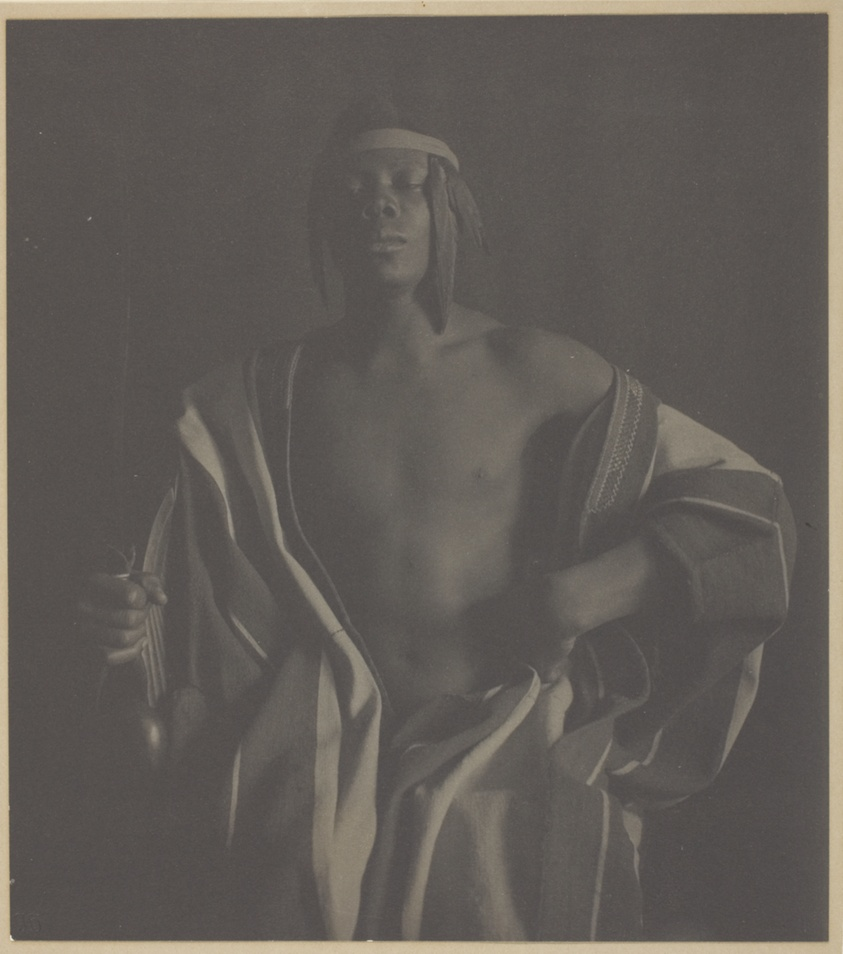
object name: Photograph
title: An Ethiopian Chief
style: Pictorialism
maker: F. Holland Day (American, 1864–1933)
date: 1897, printed c. 1902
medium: Platinum print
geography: United States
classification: platinum print; photographic process; photography; photograph